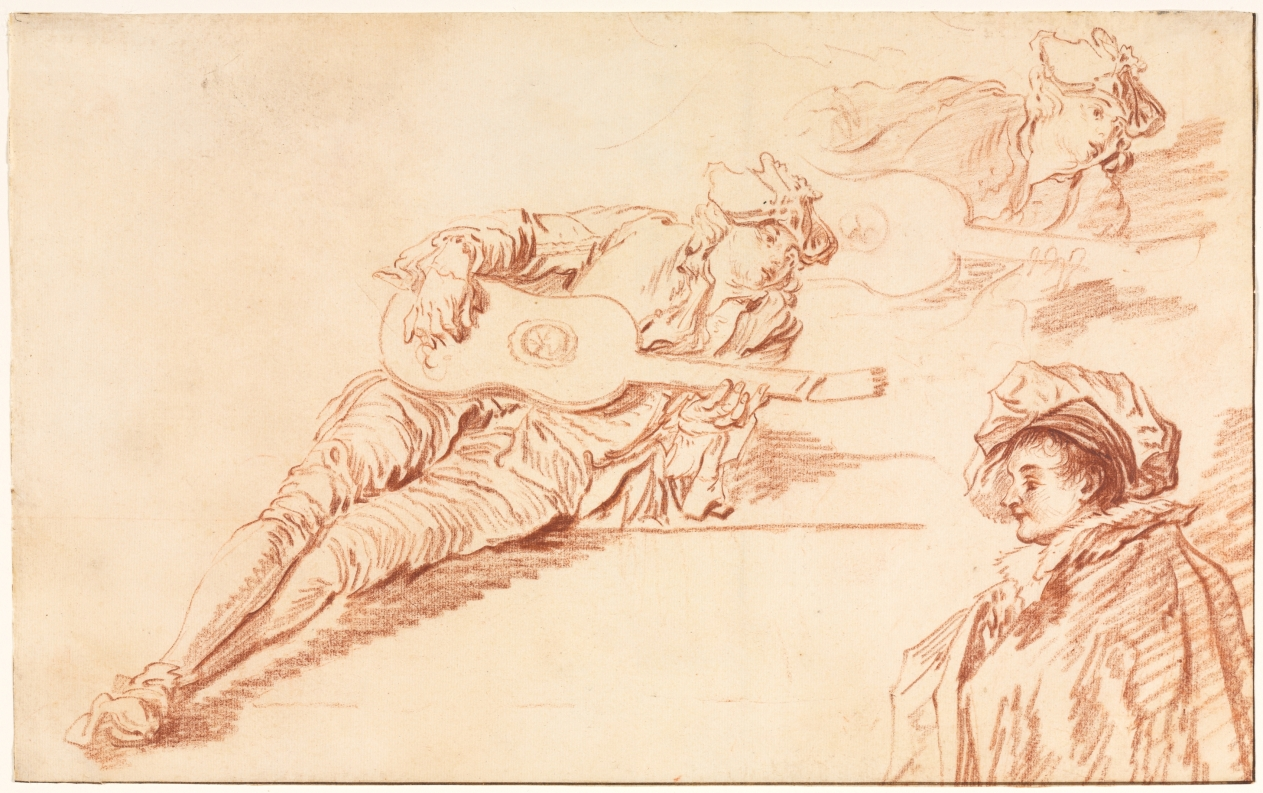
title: The Guitarist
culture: France, 18th century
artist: Jean-Baptiste Pater (French, 1695–1736)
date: 1720s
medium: red chalk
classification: Drawing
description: Like his illustrious master, Watteau, Jean-Baptiste Pater specialized in fêtes galantes, paintings that featured elegantly attired men and women in bucolic settings engaged in decorously amorous play. Also like his teacher, Pater worked out his preliminary ideas in red chalk studies. During the 17th century, guitar virtuosos from Italy and Spain made their way to the court of Louis XIV, and by the 18th century, the instrument had become integrated into French culture of gallantry and featured prominently in fêtes galantes.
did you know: Jean-Baptiste Pater worried excessively about his finances and made a prolific number of artworks as a result, with the intention of selling them.